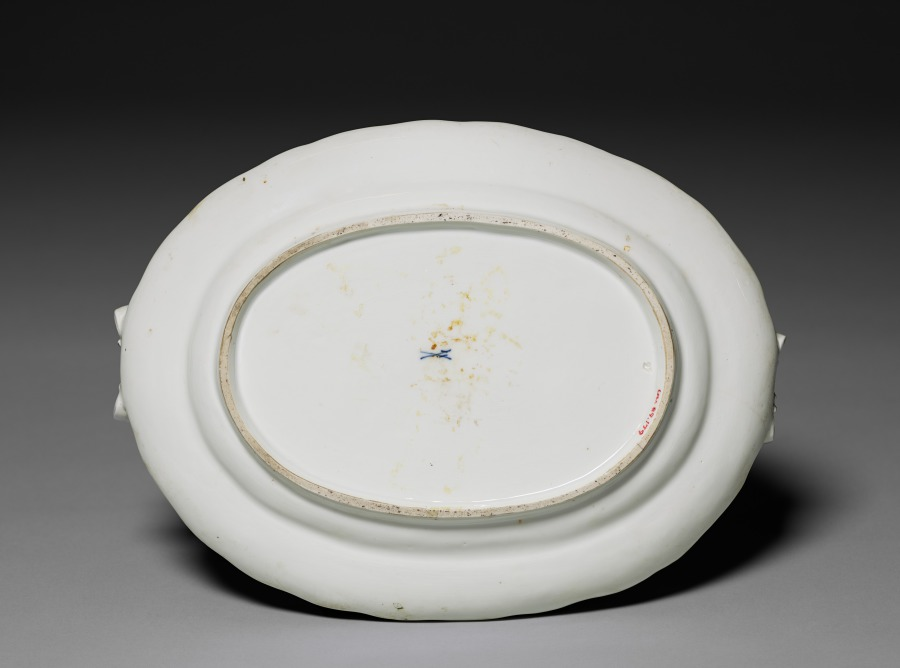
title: Tray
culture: Germany, Meissen, 18th century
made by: Meissen Porcelain Factory (German, est. c. 1710)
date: c. 1740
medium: porcelain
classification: Ceramic